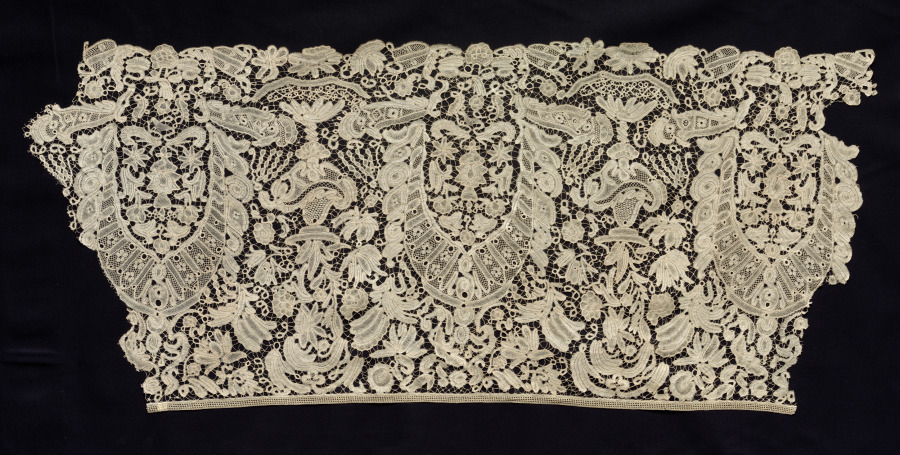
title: Fragment of a Lace Flounce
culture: Belgium, Brabant ?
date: 1700s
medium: Linen: bobbin lace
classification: Lace